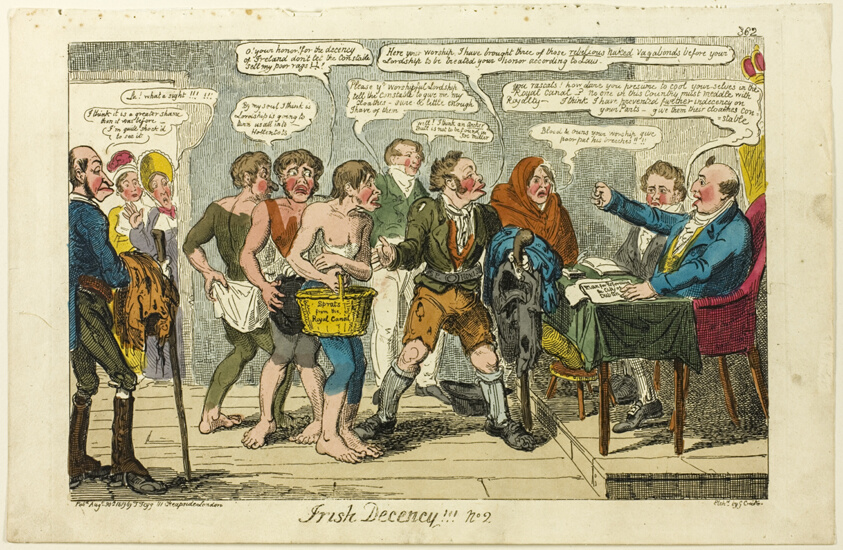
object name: Print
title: Irish Decency ! ! ! no. 2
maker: George Cruikshank (English, 1792-1878); published by Thomas Tegg (English 1776-1846)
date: published August 30, 1819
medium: Hand-colored etching on wove paper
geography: England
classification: etching; print; prints and drawing